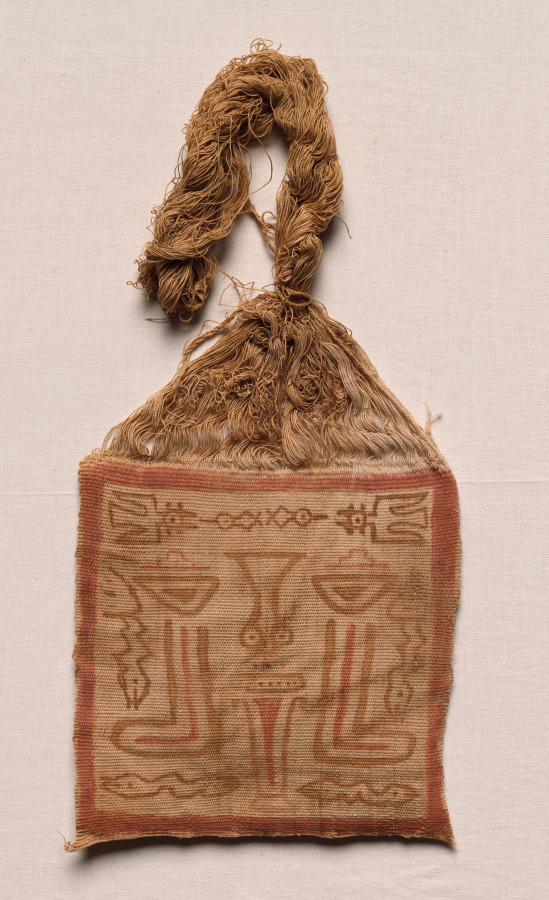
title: Mummy Bundle "Mask"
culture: Peru, South Coast, Ica Valley, Ocucaje site, Paracas style (700 BCE–1 CE)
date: 400–200 BCE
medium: cotton and pigment, plain weave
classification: Textile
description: The Paracas people buried their dead in bundles that they created by carefully wrapping the seated human body in layers of garments and other textiles. In some cases, they placed a painted cloth—such as these examples—on the outer layer and at the top of the bundle. The hair-like yarns (unwoven warps) were arranged around a solid cotton disk that was sometimes wrapped with a headband. The cloths, then, seem to have functioned as the bundle’s head, even though some are painted not with faces but with complete figures whose supernatural character is marked by the appendages streaming from their bodies.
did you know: These masks fall into two categories, those with only a face and those with a full-bodied figure.